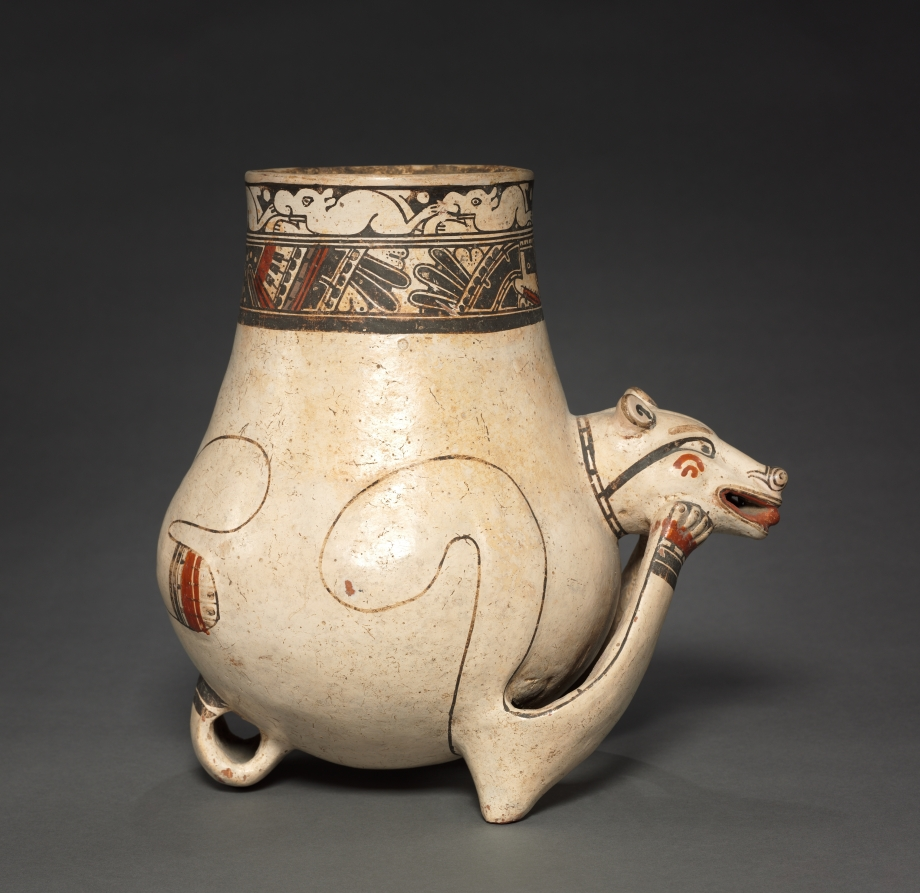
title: Animal Effigy Vessel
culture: Costa Rica, Southern Nicoya region, Pataky Polychrome style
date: 1000–1550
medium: earthenware with colored slips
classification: Ceramic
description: The Pataky style excells in animal portrayals that combine a modeled head with a flat vessel chamber that doubles as the animal’s body. It may be important that many of these animals strike human poses; creatures that combine the human and animal often have mythic import.